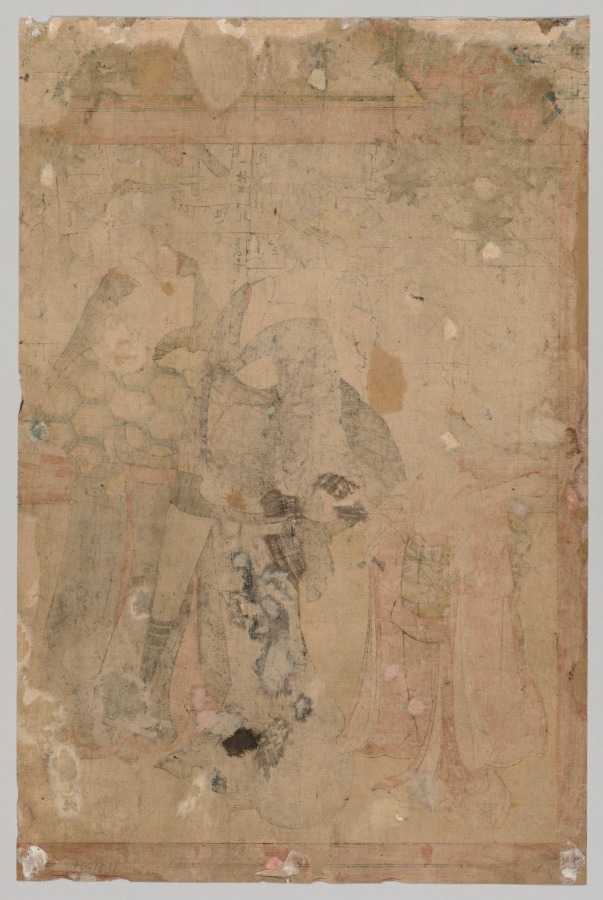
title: Examination for Writing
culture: Japan, Edo period (1615–1868)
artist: Utagawa Toyokuni (Japanese, 1769–1825)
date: 1769–1825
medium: color woodblock print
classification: Print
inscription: Signature: Toyokuni gwa Publisher Mark: Yeijudo